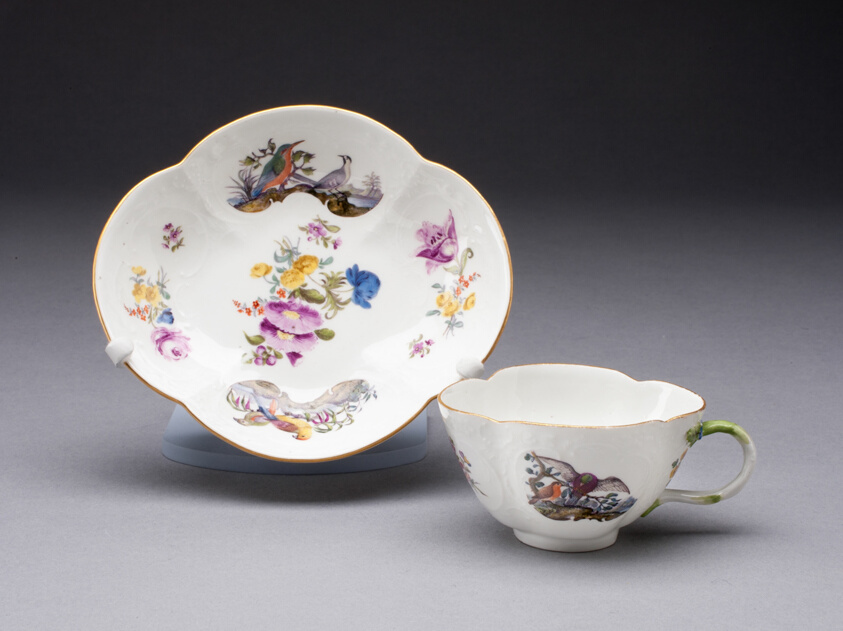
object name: Ceramics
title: Cup and Saucer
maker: Meissen Porcelain Manufactory (German, founded 1710)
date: c. 1745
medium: Hard-paste porcelain, polychrome enamels, and gilding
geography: Meissen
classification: drinking vessel; teaware; porcelain; european decorative arts; ceramics